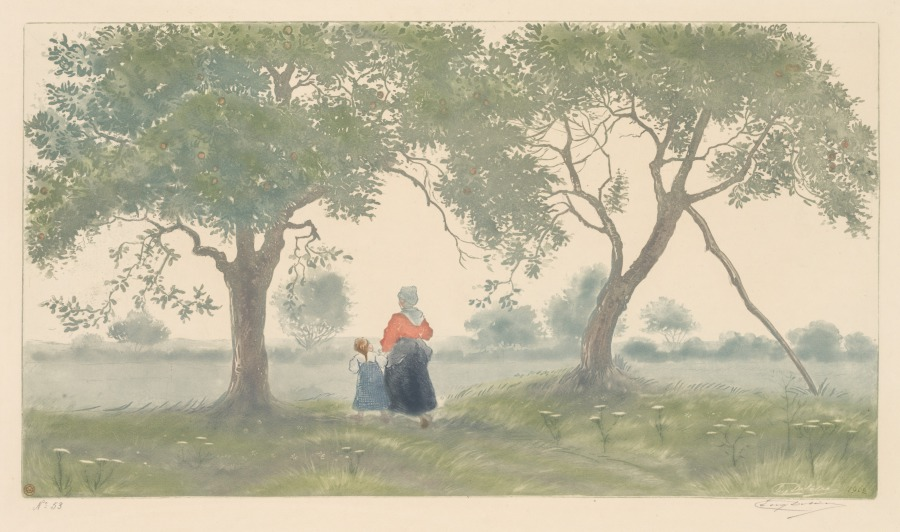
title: Les Pommiers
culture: France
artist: Eugène Delâtre (French, 1864–1938)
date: 1902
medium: color aquatint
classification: Print